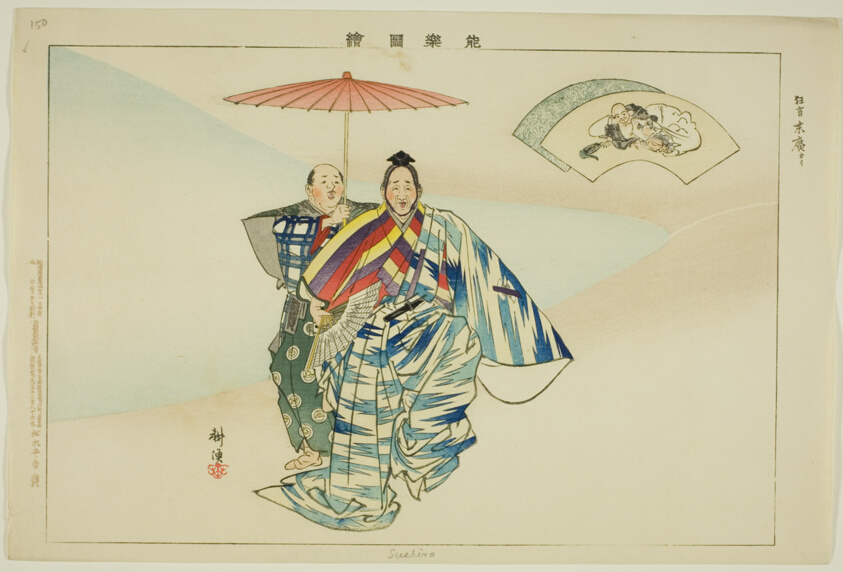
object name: Print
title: Suehiro, from the series "Pictures of No Performances (Nogaku Zue)"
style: Japanese (culture or style)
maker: Tsukioka Kogyo; Japanese, 1869-1927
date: 1898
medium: Color woodblock print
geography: Japan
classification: woodblock print; print; asian art